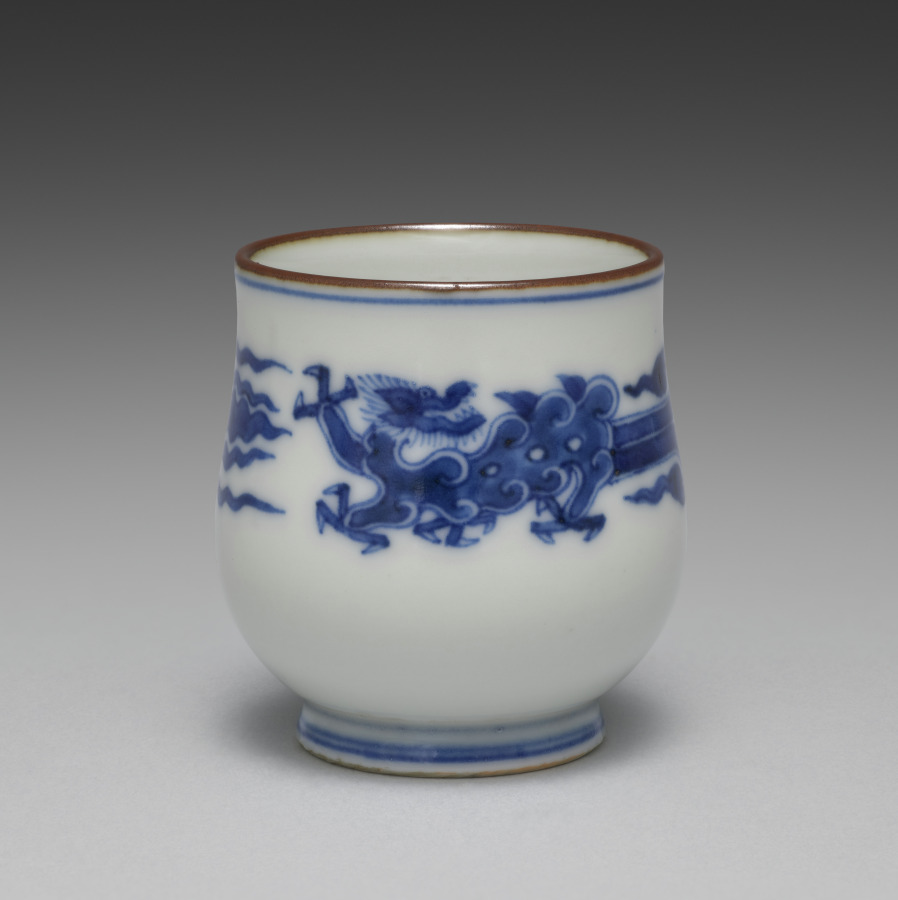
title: Cup from Sake Cups with Dragons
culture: Japan, Meiji period (1868–1912)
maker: Seifū Yohei III (Japanese, 1851–1914)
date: c. 1893–1914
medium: One from a set of six sake cups; porcelain with underglaze blue and iron oxide rims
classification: Ceramic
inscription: 大日本清風造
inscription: 清風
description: Each of these sake cups pictures two backward-looking dragons. The highly stylized creatures resemble jade carvings.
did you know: Seifū Yohei III was inspired by the Chinese mythical animals that were common on porcelain objects made at Jingdezhen in China during the Ming dynasty (1368–1644) and then exported around the world.